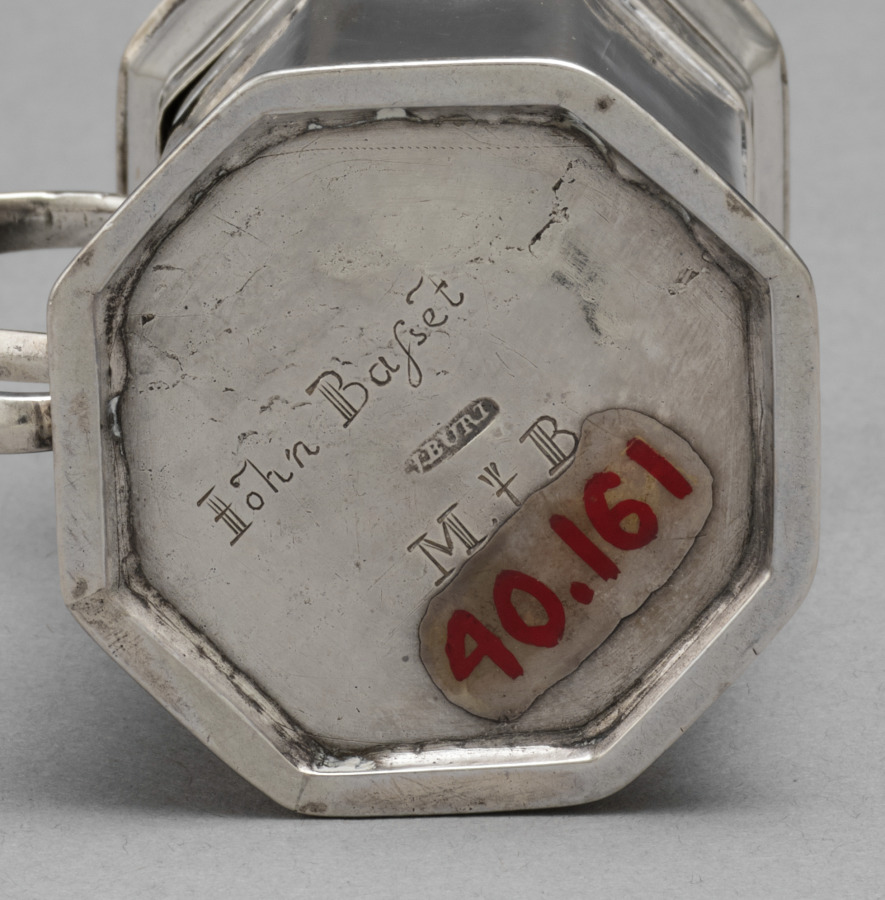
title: Caster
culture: America, Massachusetts, Boston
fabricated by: John Burt (American, 1693–1746)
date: c. 1735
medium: silver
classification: Silver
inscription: engraved "John Basset" in block capital letters and script lower-case letters and "M*B" on bottom.